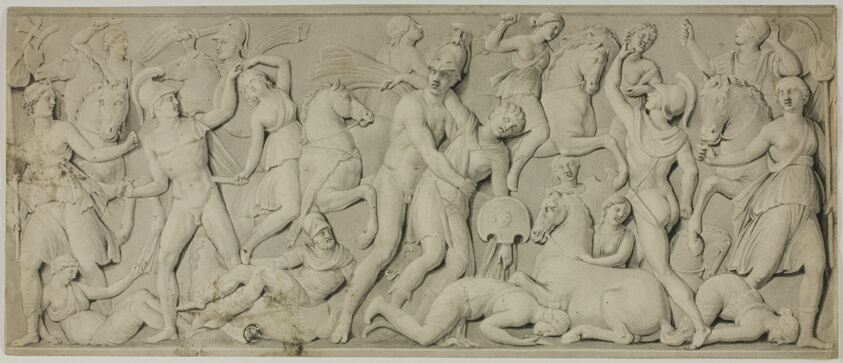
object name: Drawing and Watercolor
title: Frieze with Battle of the Amazons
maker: Unknown Artist; European, 19th century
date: 19th century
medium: Pen and black ink, with brush and gray wash, with graphite, on cream wove paper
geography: Europe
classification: ink or chalk wash; drawings (visual works); prints and drawing